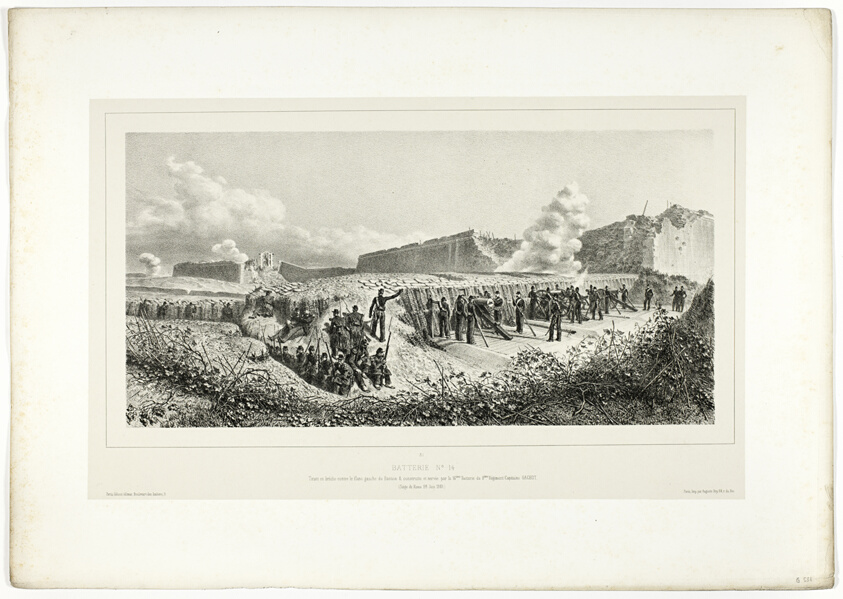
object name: Print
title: Battery no.14, from Souvenirs d’Italie: Expédition de Rome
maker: Denis Auguste Marie Raffet (French, 1804-1860); printed by Auguste Bry (French, 19th century); published by Chez Gihaut Frères (French, 19th century)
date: 1859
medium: Lithograph in black on warm ivory wove chine laid down on off-white wove paper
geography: France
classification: lithograph; print; prints and drawing